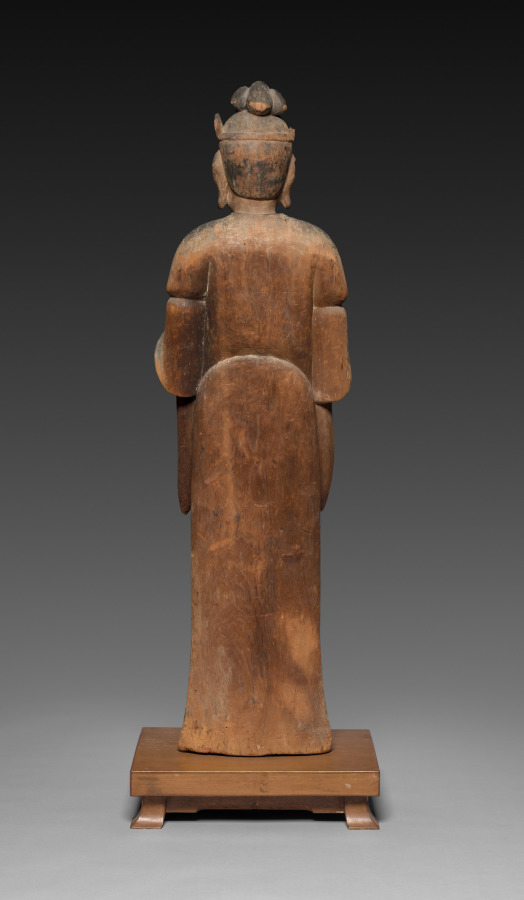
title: Deity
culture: Japan, Heian period (794–1185)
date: 1100s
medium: Magnolia wood with traces of color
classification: Sculpture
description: This unidentified sculpture represents a mature male figure with a long beard. His robes, crown-like head ornament, and hair arranged into a topknot resemble the attire and styling of members of the heavenly realm—tenbu in Japanese—of the Buddhist cosmos. The comparatively simple design, along with carving marks purposely left by the sculptor throughout the surface tend to be associated with sculptures of kami, deities venerated at shrines, or jinja.